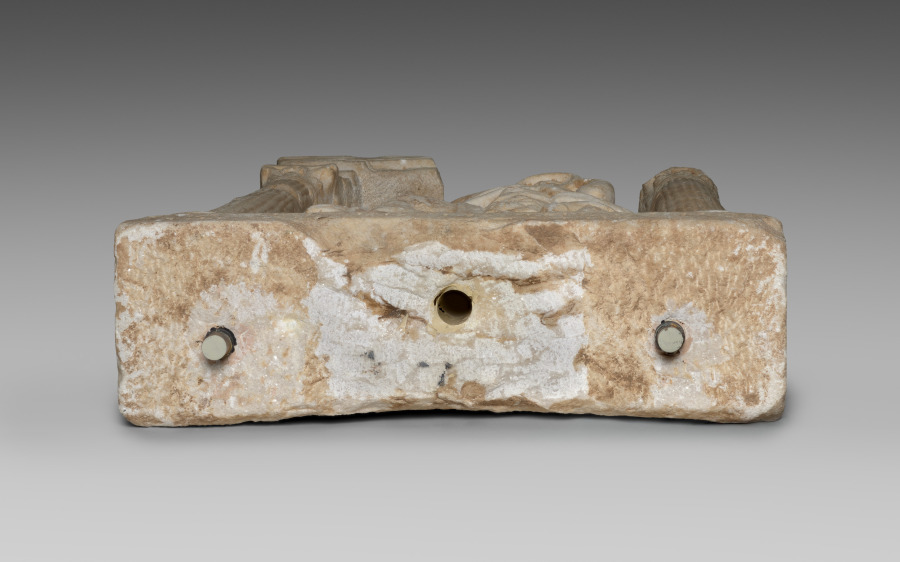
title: Grave Stele (Relief)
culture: Southern Anatolia, Pamphylia, Hellenistic Greek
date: c. 50 BCE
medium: marble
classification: Sculpture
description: The multiple figures, inscription, use of perspective, and architectural frame distinguish this ambitious relief as one of the most important of its type. The Greek inscription on the base reads, “To Sbardia, also named Tate, Eumelos, son of Aphrodisios, her father, [set this up].” The deceased is shown seated on an elaborate chair. A servant girl holding a fan suggests Sbardia’s high social standing. At the bottom right corner, a hen perches on an upturned basket, a symbol of “the good life.” The stele incorporates a “springing” gable supported by engaged half columns with simplified Corinthian capitals. Other features relate to beliefs about mortality and the afterlife. Above and to the left of her chair is her winged psyche (soul) shown leaving her body. Figures of the three fates are shown in the pediment above, reminding us that human life is finite.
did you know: The seated woman is depicted larger to visually emphasize her importance; her servant is in the background.